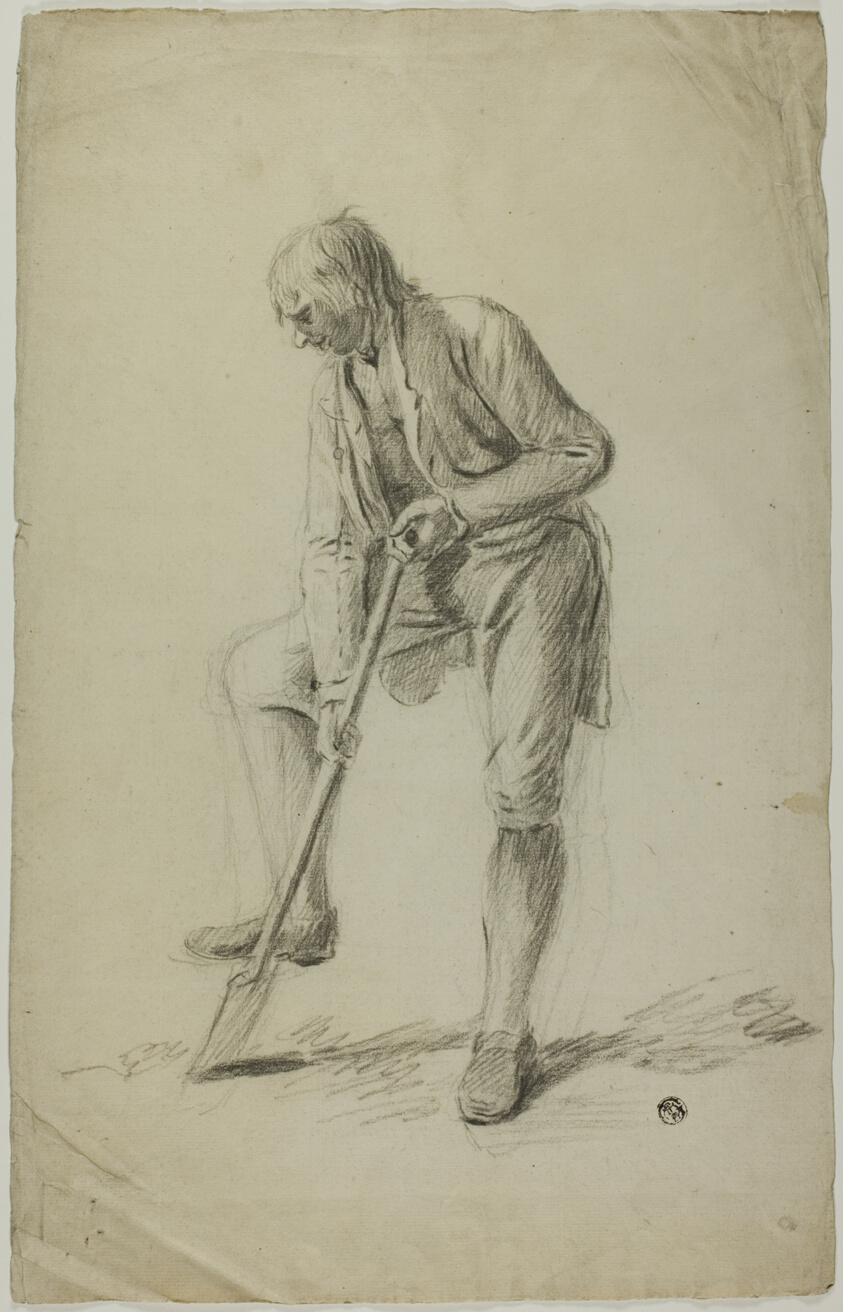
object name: Drawing and Watercolor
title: Man Digging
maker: Unknown Artist; English, 18th century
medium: Charcoal on cream laid paper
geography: England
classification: charcoal; drawings (visual works); prints and drawing